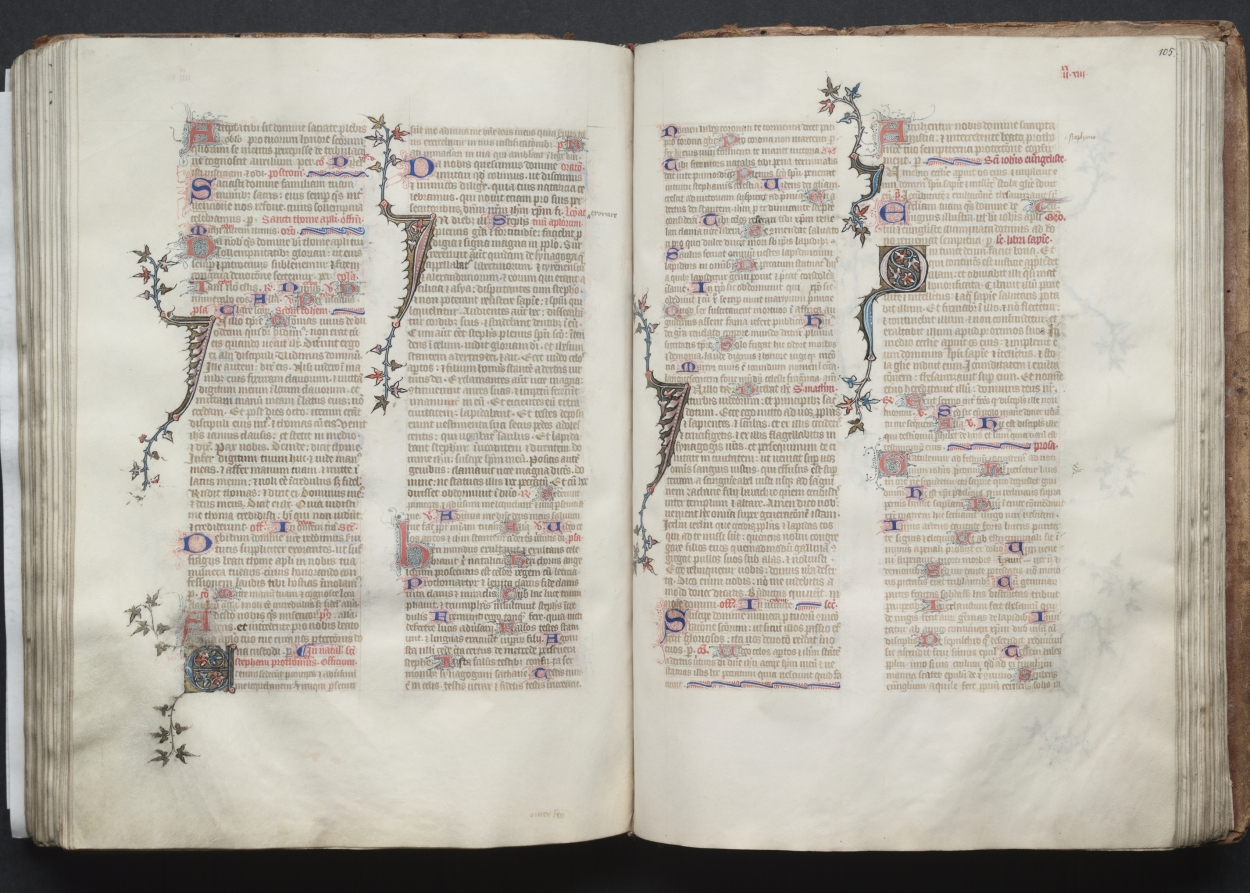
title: The Gotha Missal: Fol. 105v, Text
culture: France, Paris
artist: Master of the Boqueteaux (French)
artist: and Workshop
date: c. 1375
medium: ink, tempera, and gold on vellum; blind-tooled leather binding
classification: Bound Volume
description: The style and quality of this manuscript's decoration is typical of deluxe Parisian books made for aristocratic or royal patrons. Most of the book's decoration appears to be the work of the Master of the Boqueteaux, an artist active at the court of King Charles V (died 1380). His style was apparently shared by a number of book illuminators working in and around Paris. It is very possible that the Gotha Missal belonged to Charles V, but is not provable because the manuscript has no royal portraits and lacks a colophon. Given the book's magnificent decoration, however, it would seem that it was produced for a Valois prince, if not for the king himself. The manuscript receives its name from the German dukes of Gotha, its later owners.